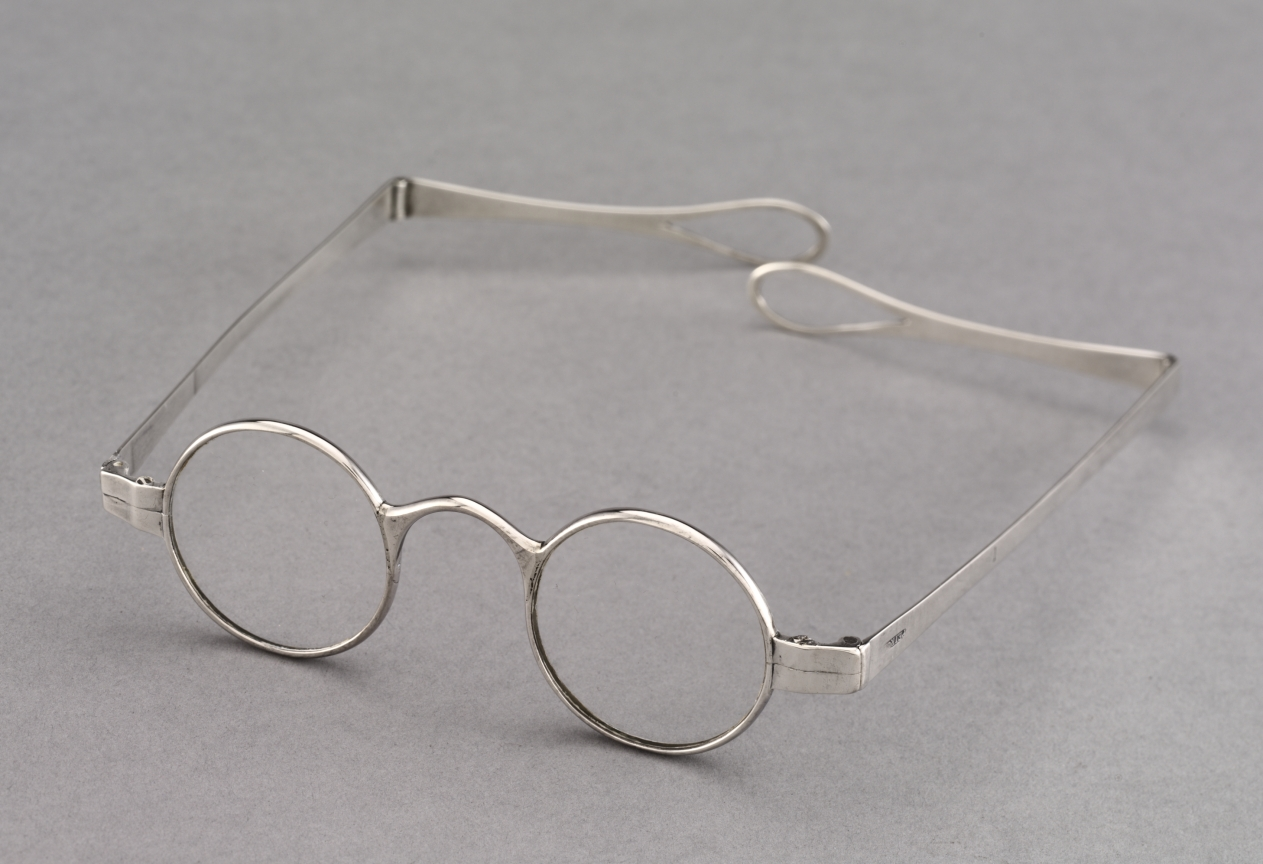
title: Spectacles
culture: America, Massachusetts, Boston, 19th century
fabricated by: John Peirce (American)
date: c. 1816–1820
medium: silver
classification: Silver